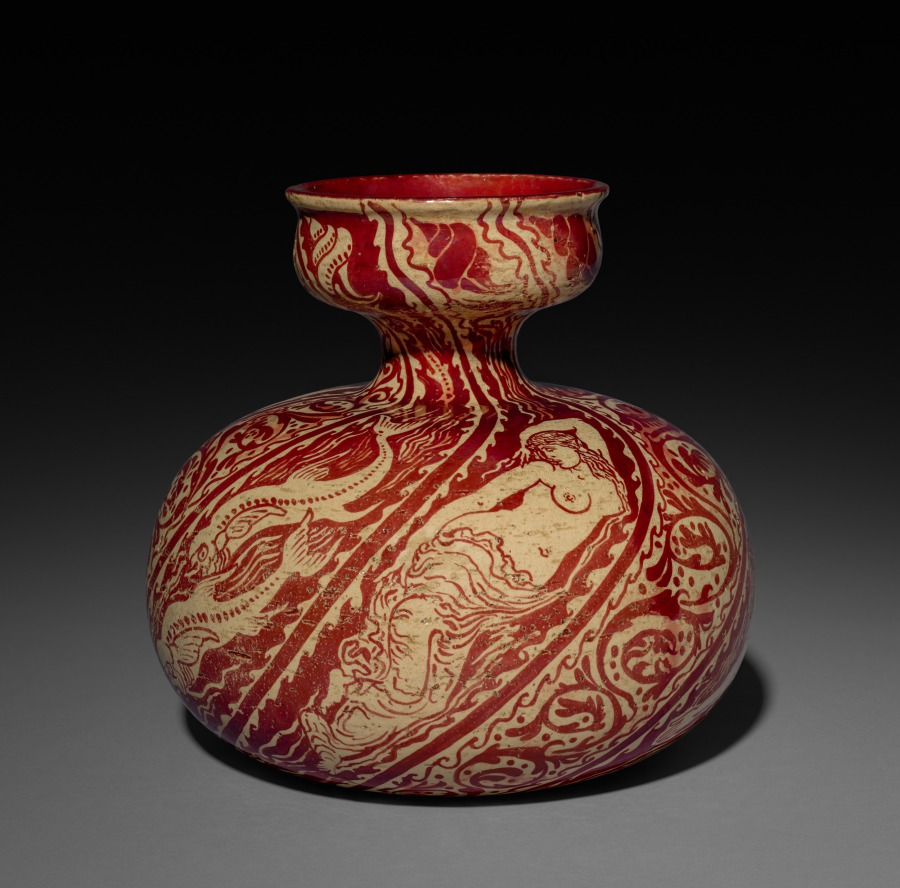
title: Vase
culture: Britain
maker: Walter Crane (British, 1845–1915)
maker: Maw & Co. (British (modern), 1850–1969)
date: 1889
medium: Earthenware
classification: Ceramic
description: Walter Crane was one of the leading figures of the British Arts and Crafts movement. His work helped establish a renewed interest in Renaissance ceramics and the importance of illustration in decorative ceramics. He collaborated with several major manufacturers of decorative furnishings including Maw & Co., an important manufacturer of aesthetic period tiles and other decorative ceramics. This vase is one of a series of vases that Crane designed for Maw around 1889 when they first appear listed in the catalogue of the Arts and Crafts Exhibition Society in London of that year, described along with a series of tiles that Crane also designed for Maw. Its brilliant ruby-red luster surface is a hallmark of Maw’s work featuring Crane’s lyrical designs while referencing earlier 15th- and 16th-century Spanish lusterware.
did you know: The red glaze on this vase resembles the color of oxblood.